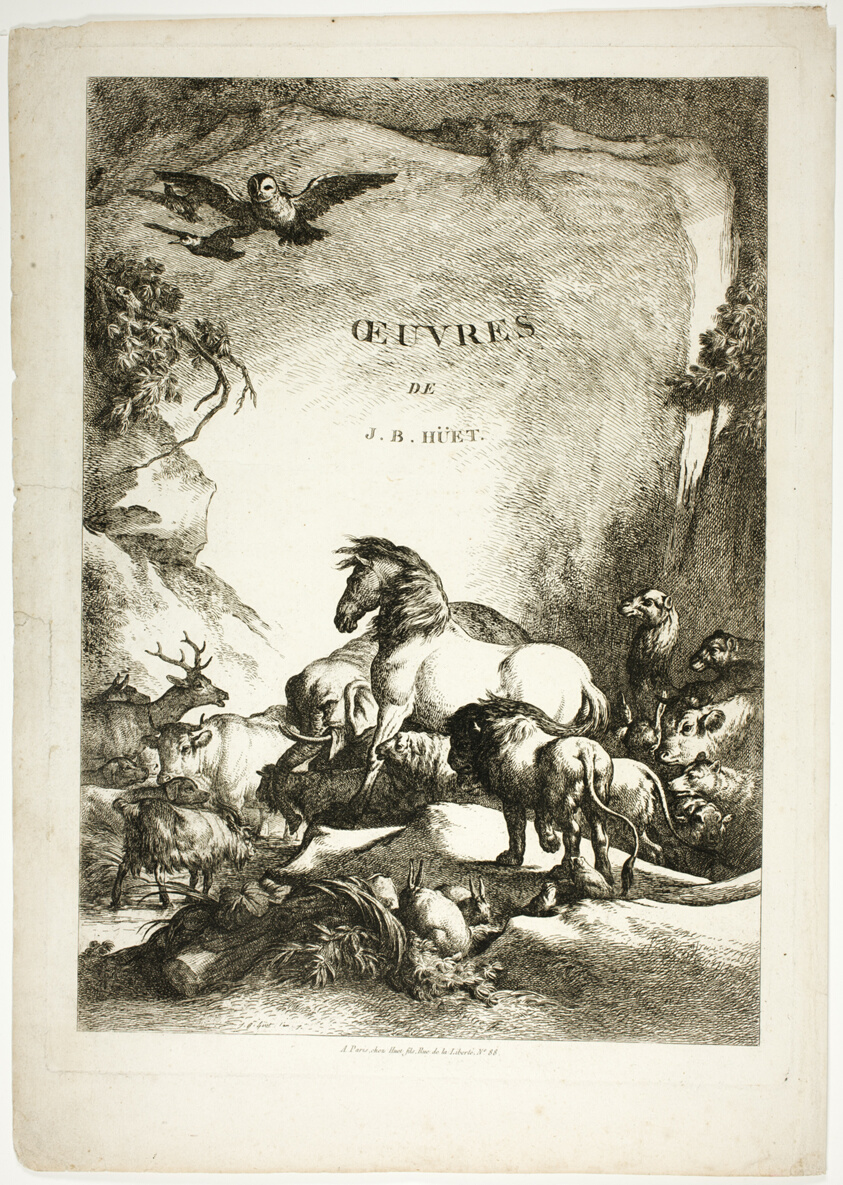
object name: Print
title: Title Page from Oeuvres de J. B. Huet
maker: Jean Baptiste Huet (French, 1745-1811)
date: 1796–99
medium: Etching on paper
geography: France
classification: etching; print; prints and drawing